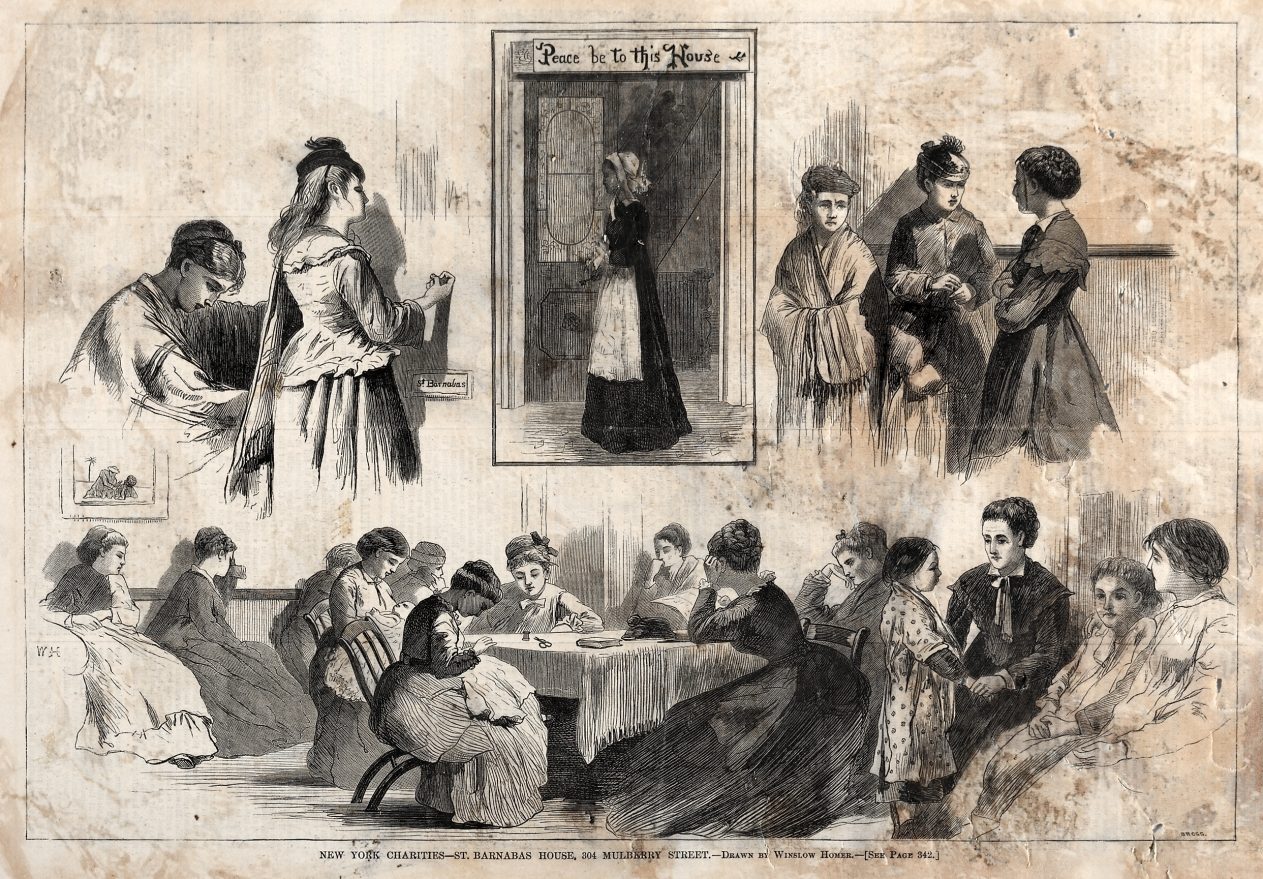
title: New York Charities - St. Barnabas House, 304 Mulberry Street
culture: America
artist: Winslow Homer (American, 1836–1910)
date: 1874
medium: wood engraving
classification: Print